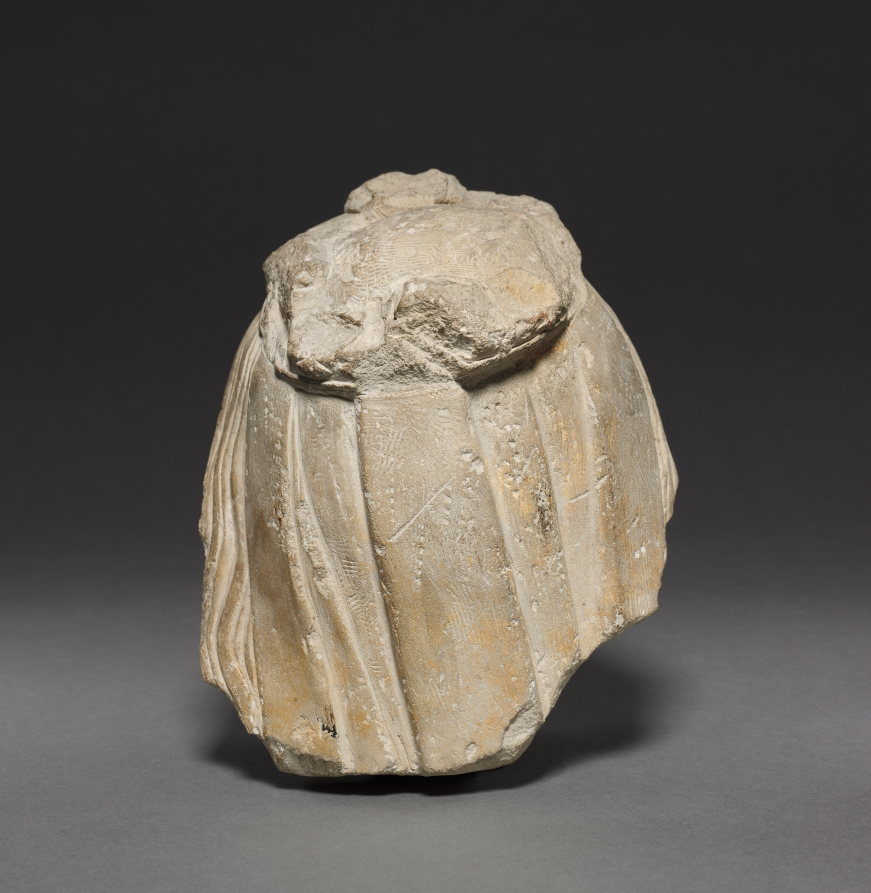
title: Crowned Female Head (Fragment)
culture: France, Champagne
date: c. 1400–1420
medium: limestone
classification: Sculpture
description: The origins of this sculptural fragment are not known. It is perhaps the final trace of the once beautiful figure of a standing Virgin and Child.